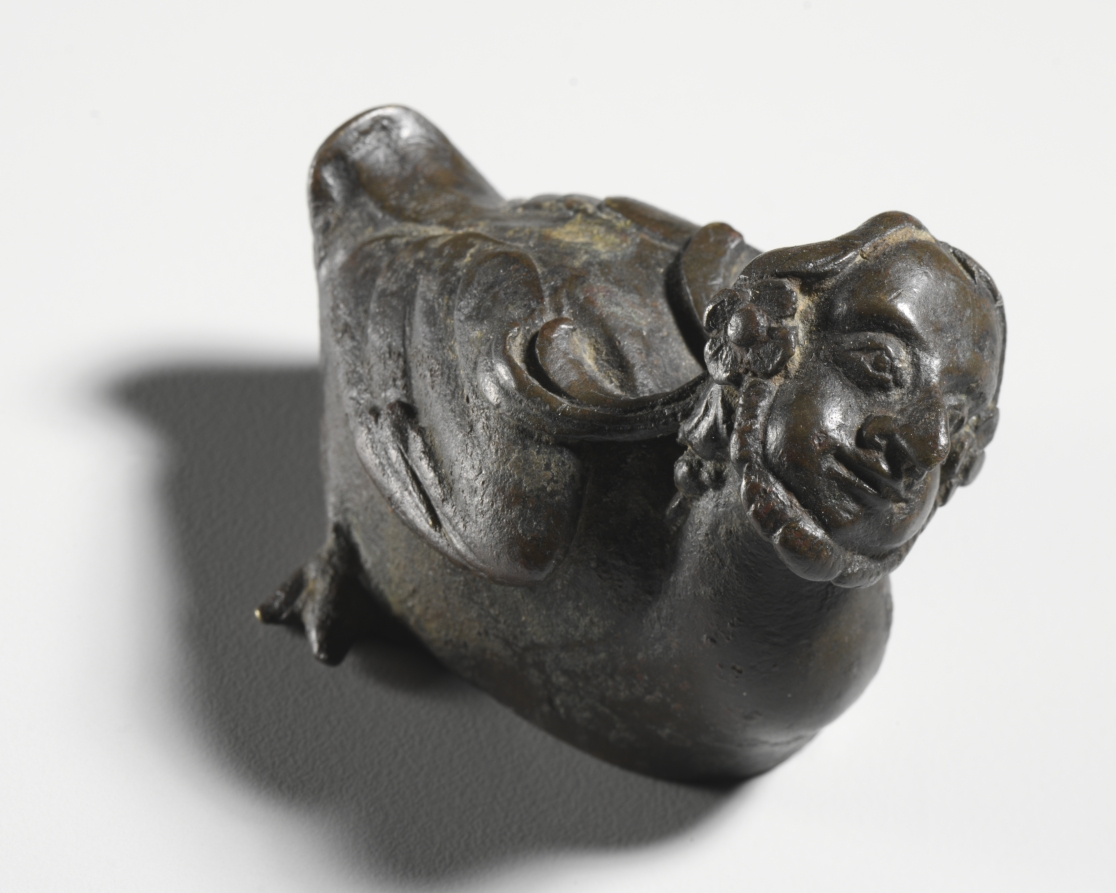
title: Bird with Human Head, possibly Hermes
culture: Pakistan, Gandhara, Kushan period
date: c. 200s–300s CE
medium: bronze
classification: Sculpture